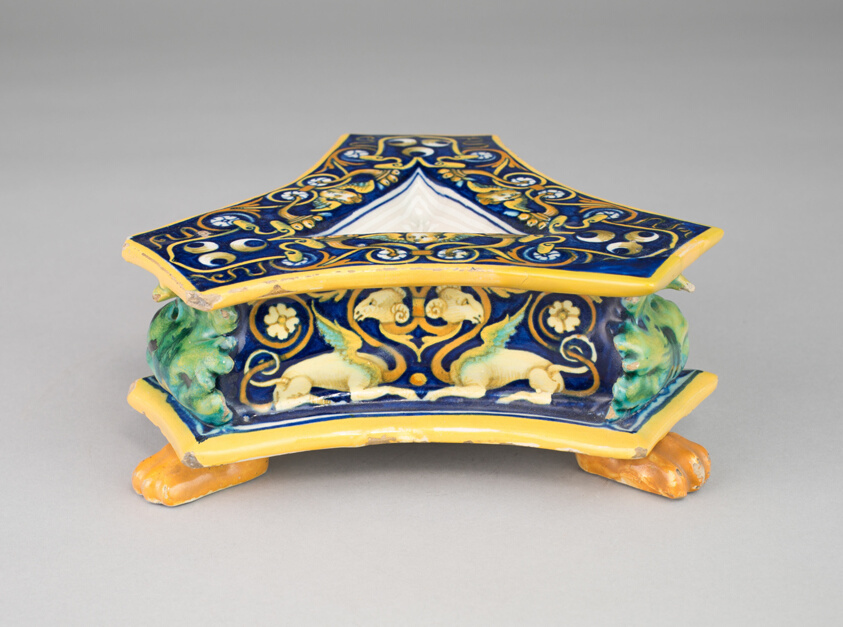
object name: Ceramics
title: Salt Cellar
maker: Attributed to the Milan Marsyas Painter; (Italian, active about 1525-1535)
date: c. 1530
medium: Tin-glazed earthenware (maiolica)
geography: Urbino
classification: earthenware; european decorative arts; ceramics; decorative arts